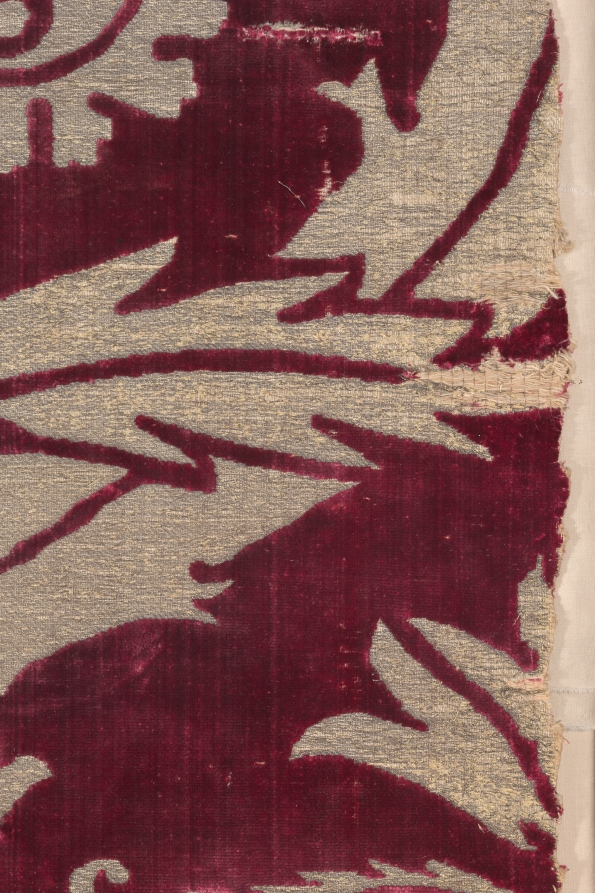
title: Brocaded Velvet Panel with Italianate Pattern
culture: Turkey, Istanbul or Bursa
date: 1575–1625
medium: Silk: velvet, brocaded; gilt-metal thread and cotton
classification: Velvet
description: Rarely are four fabric widths preserved together from any culture. This gilt-metal thread pattern combines Turkish and Italian features: the large ogival (curved) lattice clasped by crowns and the velvet structure are Turkish, and the two so-called artichoke designs are enlarged adaptations of Italian motifs. A symbol of wealth and power, this velvet panel was woven during the artistic height of the Ottoman Empire in the late 1500s. It may have covered a divan (sofa) or possibly enhanced a wall during cold winters in the imperial Topkapi Palace in Istanbul.